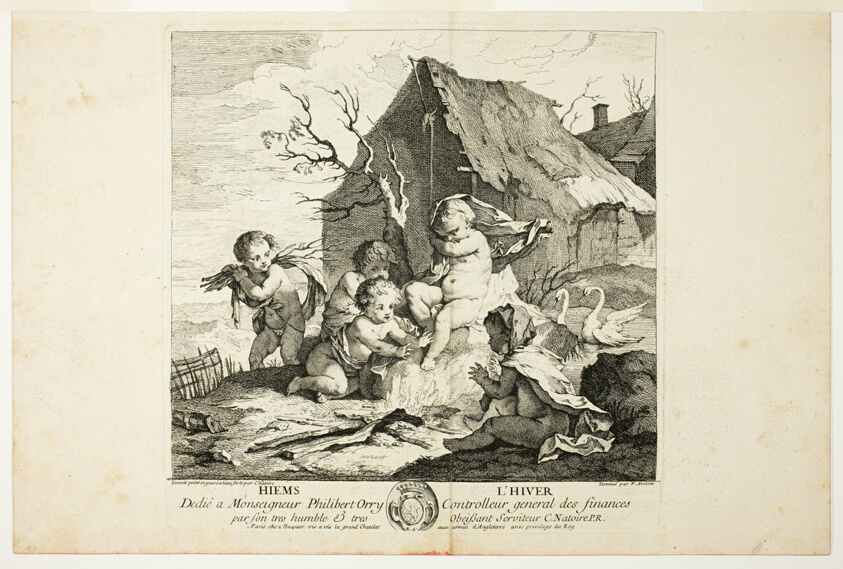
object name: Print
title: Winter, plate four from Le Quatre Saisons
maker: Charles-Joseph Natoire (French, 1700-1777)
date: 1735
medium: Etching on buff laid paper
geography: France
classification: etching; print; prints and drawing